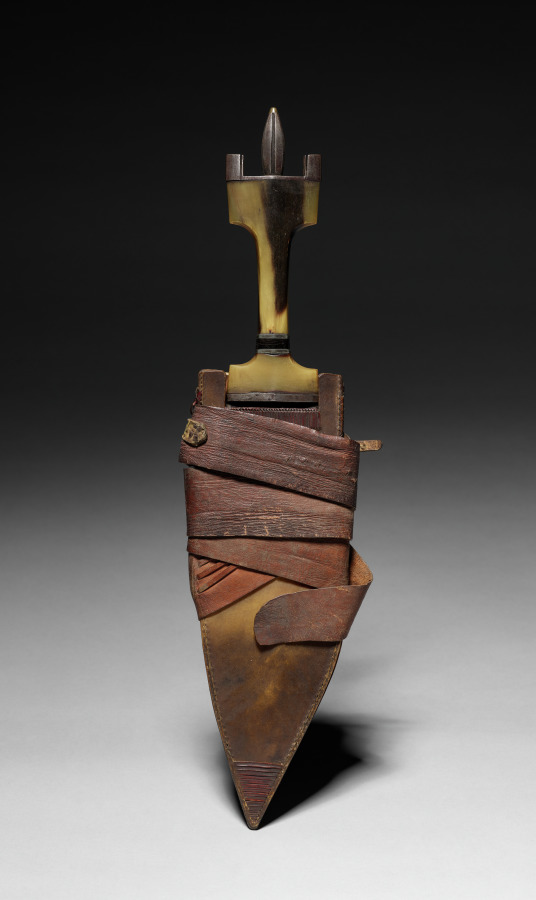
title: Knife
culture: Africa, unknown maker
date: 1800s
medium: Steel, leather or rawhide, and horn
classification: Arms and Armor